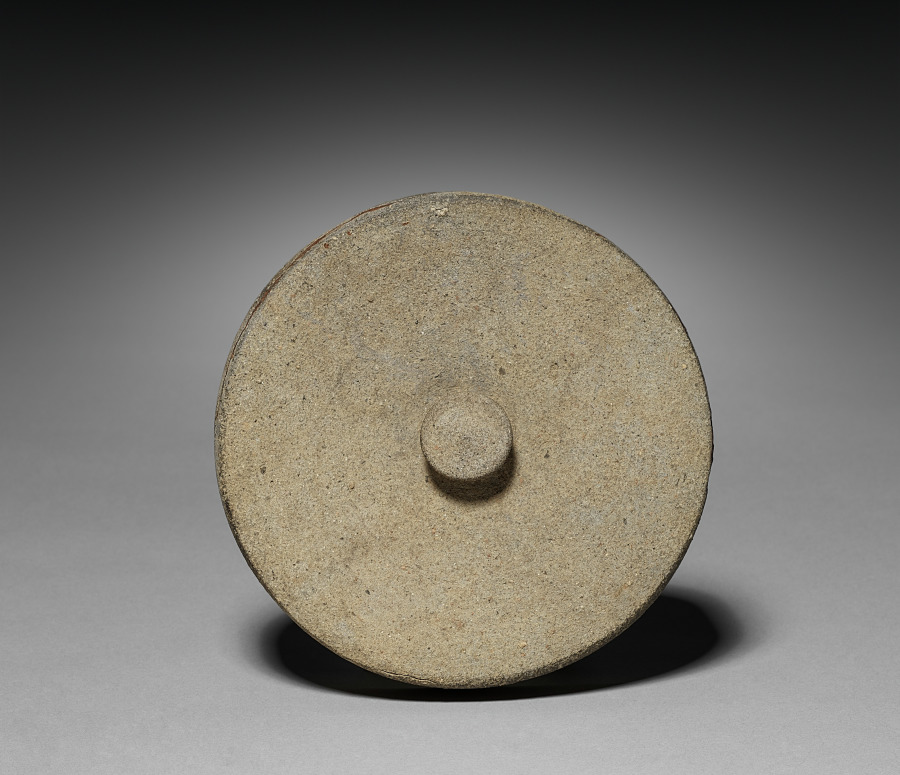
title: Cinerary Urn (lid)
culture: Japan, Heian period (794–1185)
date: c. 800–850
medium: stoneware with slight natural ash glaze (Sue ware)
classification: Ceramic